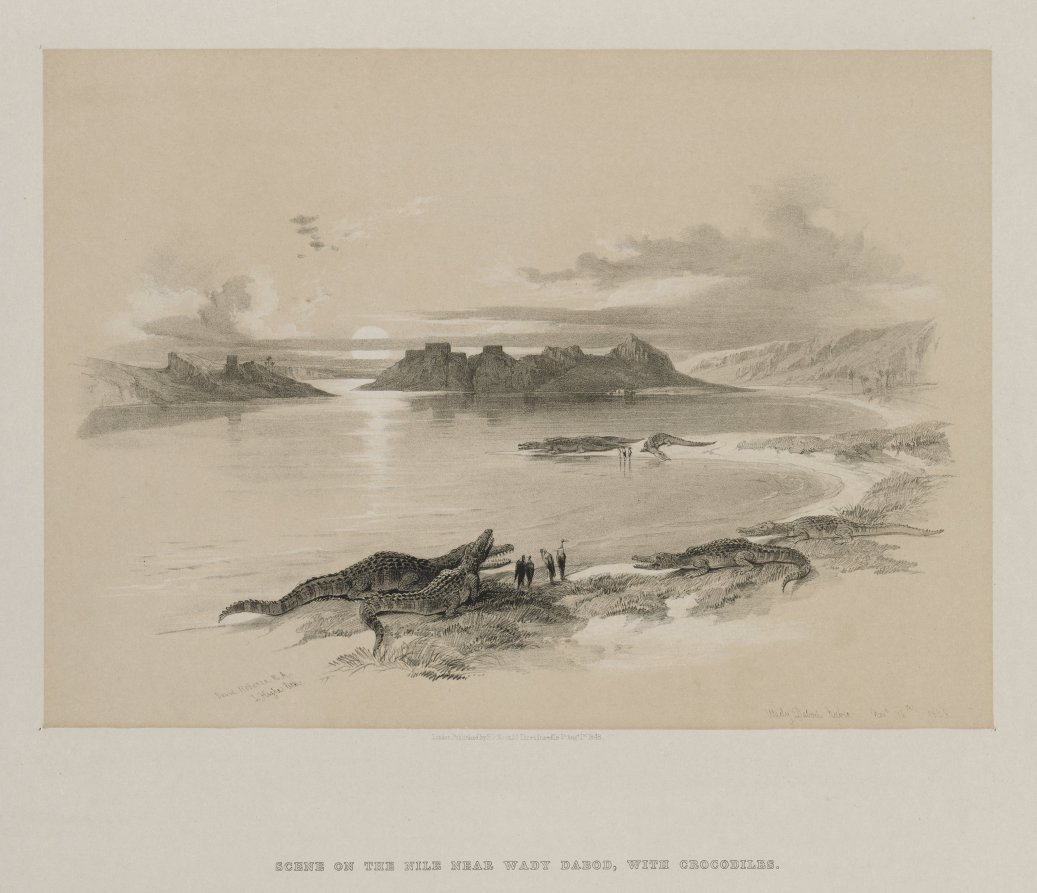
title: Egypt and Nubia, Volume II: Wady Dabod, Nubia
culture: England, 19th century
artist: Louis Haghe (British, 1806–1885)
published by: F. G. Moon, 20 Threadneedle Street, London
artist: after David Roberts (Scottish, 1796–1864)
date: 1848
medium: color lithograph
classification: Print